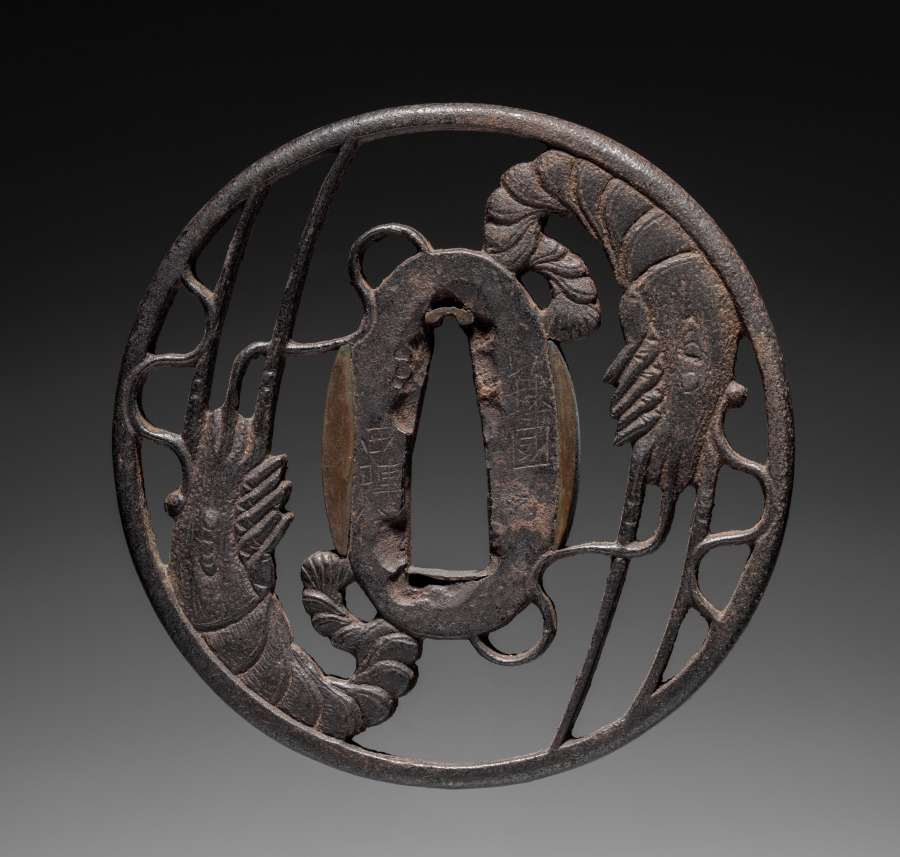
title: Sword Guard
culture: Japan, Edo period (1615–1868)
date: 1700s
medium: iron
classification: Arms and Armor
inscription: Signature: Umetada, residing at Nishijin, Yamashiro province